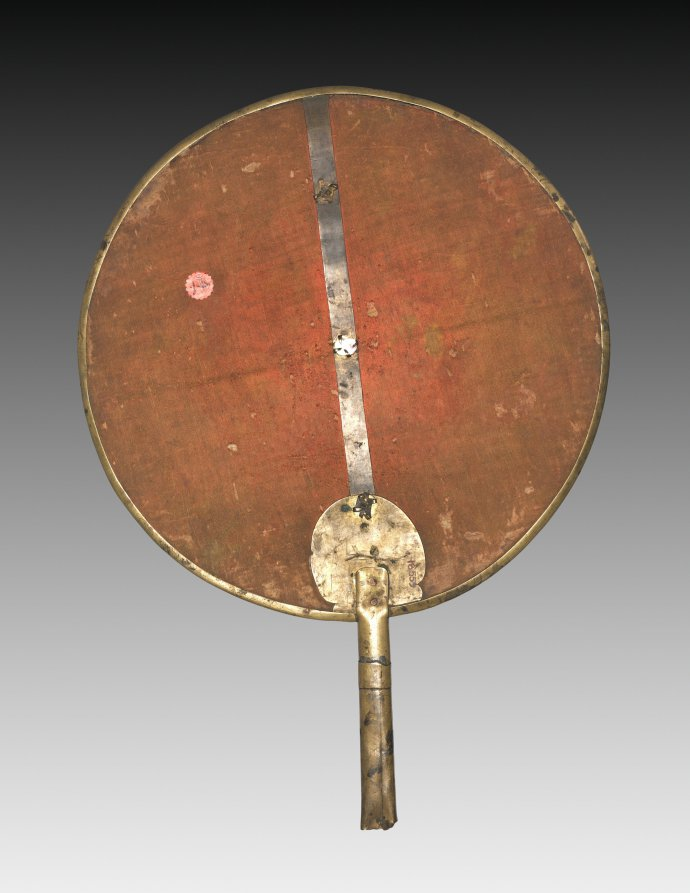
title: Embroidered Fan for Wedding Ceremony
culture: Korea, Joseon dynasty (1392–1910)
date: 1850–1950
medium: Circular fan; copper alloy, silk, metal thread, and paper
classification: Miscellaneous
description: In the Joseon period, women between the ages of 14 and 20 were matched with a husband through an arranged marriage. Even during the marriage ceremony, a bride was supposed to veil her face with this type of embroidered fan as a gesture of chastity. The fan’s body is made of paper and silk trimmed with a gilded metal rim. On the front, four cranes—one pair in blue, the other in yellow—are stitched along with auspicious clouds. The back is adorned with cranes flying amid clouds and blossoms of peonies.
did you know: This fan was not to cool oneself, but rather to veil a bride's face during a wedding ceremony as a gesture of chastity.